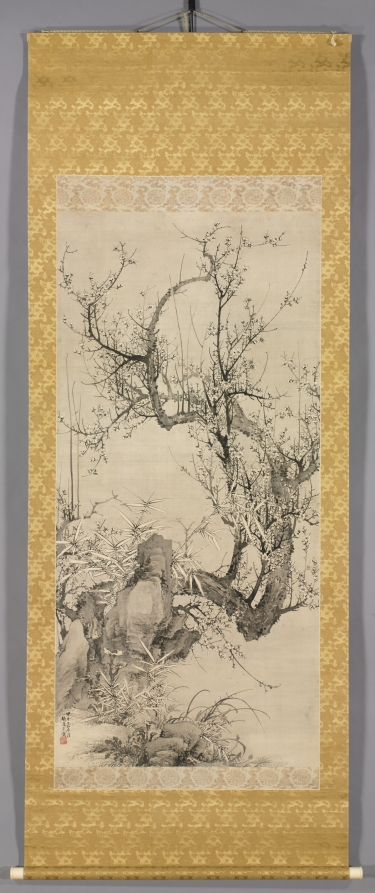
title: Plums, Bamboo, and Orchid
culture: Japan, Edo period (1615–1868)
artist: Yamamoto Baiitsu (Japanese, 1783–1856)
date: 1834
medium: hanging scroll; ink on silk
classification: Painting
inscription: date and signature at lower left.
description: This painting represents three of the plants known as the Four Gentlemen of Chinese painting; it lacks only autumn’s chrysanthemum. The plants’ characteristics are symbols of Confucian virtues, such as open-mindedness (bamboo), strength in the face of adversity (plum), and humility (orchid).